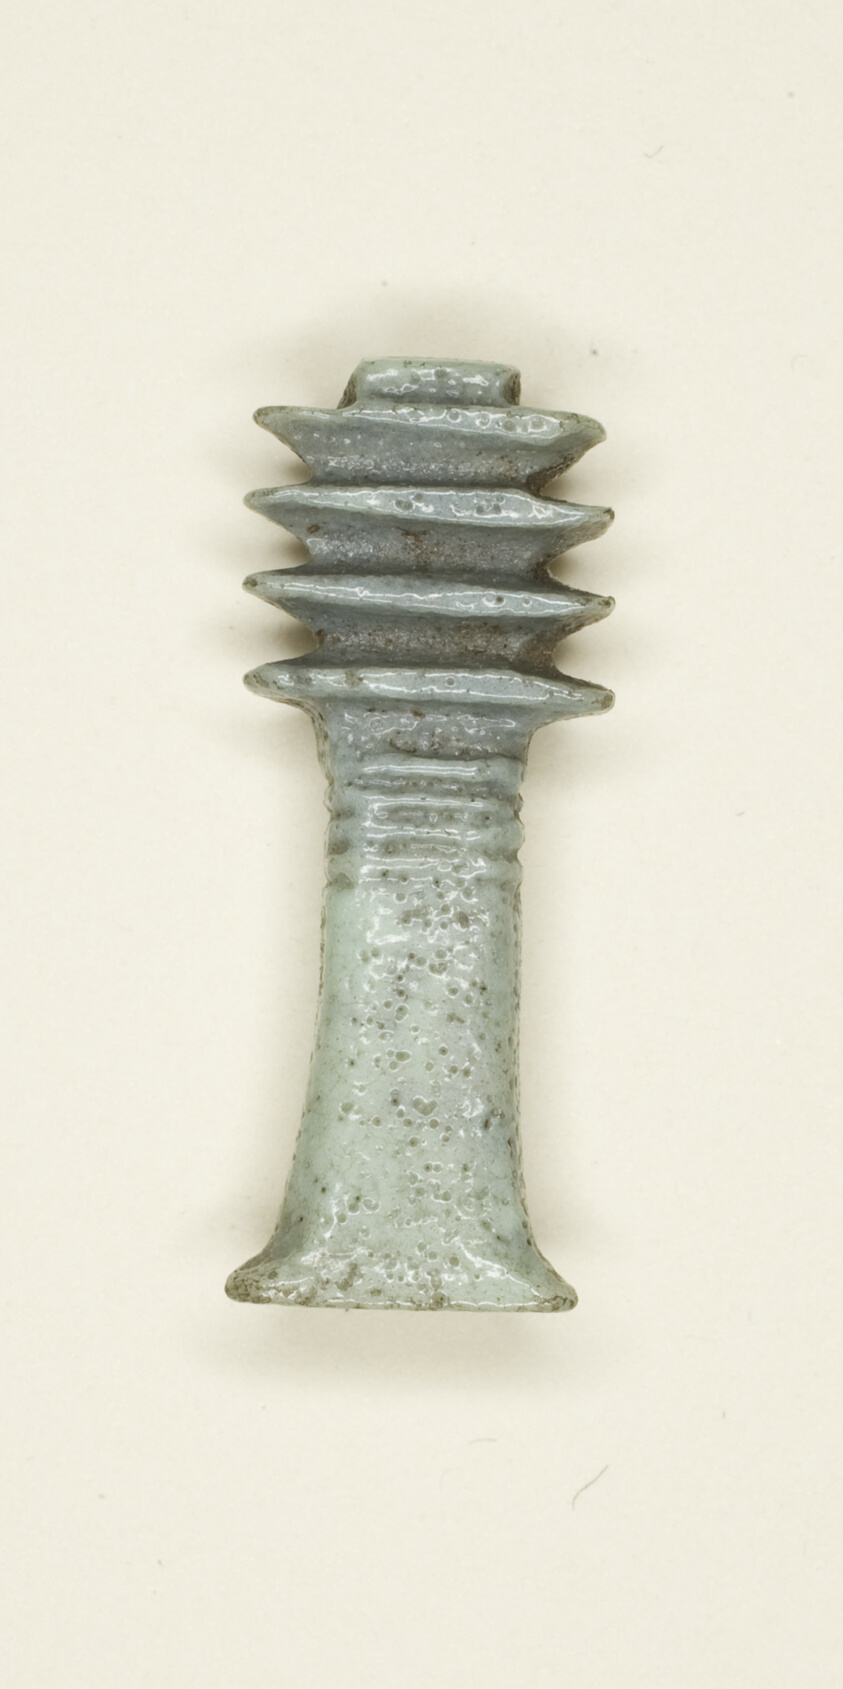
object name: Costume and Accessories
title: Amulet of a Djed Pillar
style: third intermediate period, egyptian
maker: Egyptian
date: Third Intermediate Period, Dynasty 21–25 (1070–656 BCE)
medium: Faience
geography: Egypt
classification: amulet; jewelry; ceramics; ancient art; costume; faïence (composite material)